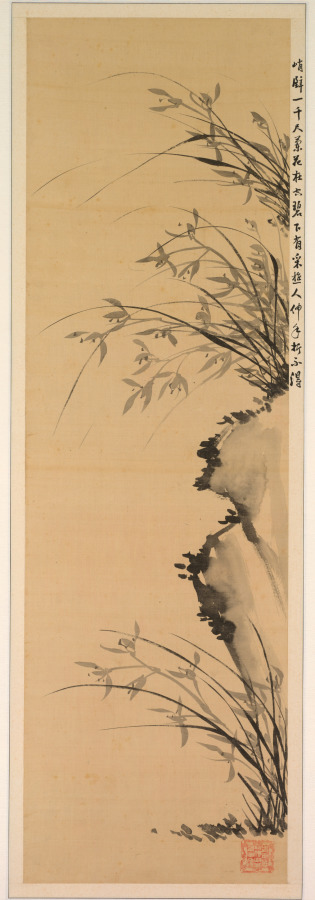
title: Orchids and Rocks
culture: Korea, Joseon dynasty (1392–1910)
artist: Yi Ha-eung (Korean, 1820–1898)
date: 1897–98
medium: Eight-panel folding screen; ink on silk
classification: Painting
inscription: Translation: [I] painted for the high minister Yangwon. [I] humbly request your corrections and advice [on my painting]. [By] an eighty-year old gentleman of rocks.)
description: Yi Ha-eung (1820−1898), the artist of this eight-panel folding screen, was one of the most influential men in late 19th-century Korea. Acting as the regent for his son, King Gojong (1852−1919), who ascended the throne at the age of thirteen, Yi ruled Korea from 1866 to 1873. In addition to his illustrious political career, Yi was also recognized as one of the most celebrated artists who led the revival of literati art in late 19th-century Korean art. In particular, he was recognized as the master of orchids, one of the “Four Gentlemen” (plum, orchid, chrysanthemum, and bamboo) themes. Solely relying on monochrome ink, Yi depicted the curvilinear silhouettes of cymbidium orchid leaves dramatically hanging down from cliffs. Growing in wilderness and redolent with fragrance, orchids were often associated with the perseverance of principled gentlemen, and thus became one of the most popular subjects of scholar-artists' paintings.On the upper right corner of the far left panel, Yi wrote a short inscription stating that he painted the work at the age of 80.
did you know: The artist of this elegant painting is the formidable politician Yi Ha-eung (1820–1898), who is known for a seclusion policy that aimed to protect Korea and its sovereignty from foreign influences.